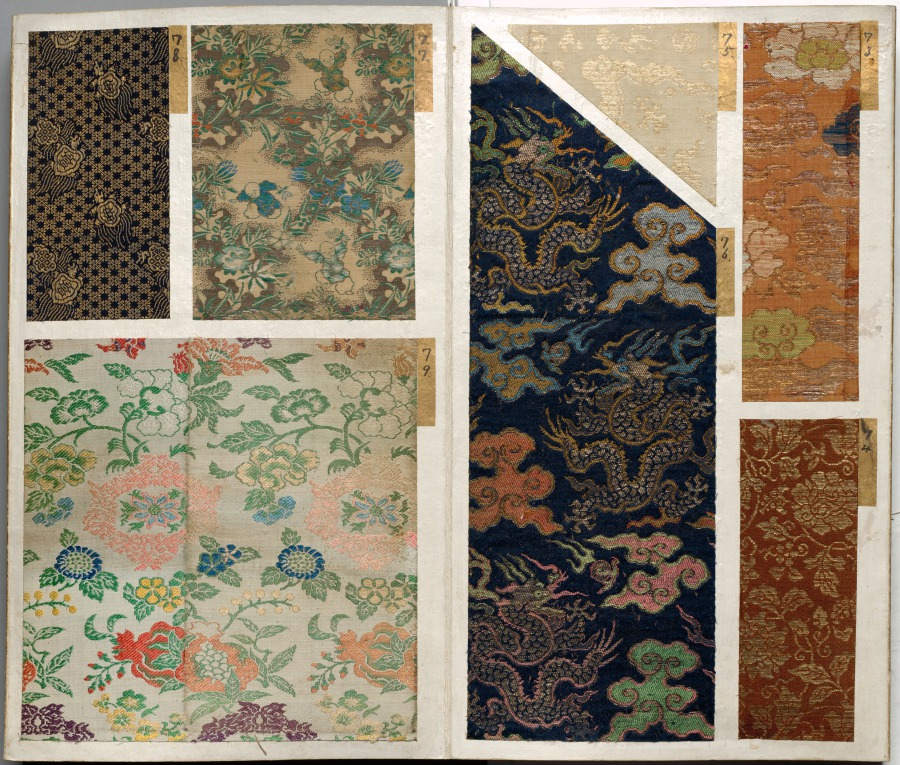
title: Album of Textile Samples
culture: Japan, Edo period (1615–1868)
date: 1600s-1700s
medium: silk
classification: Textile